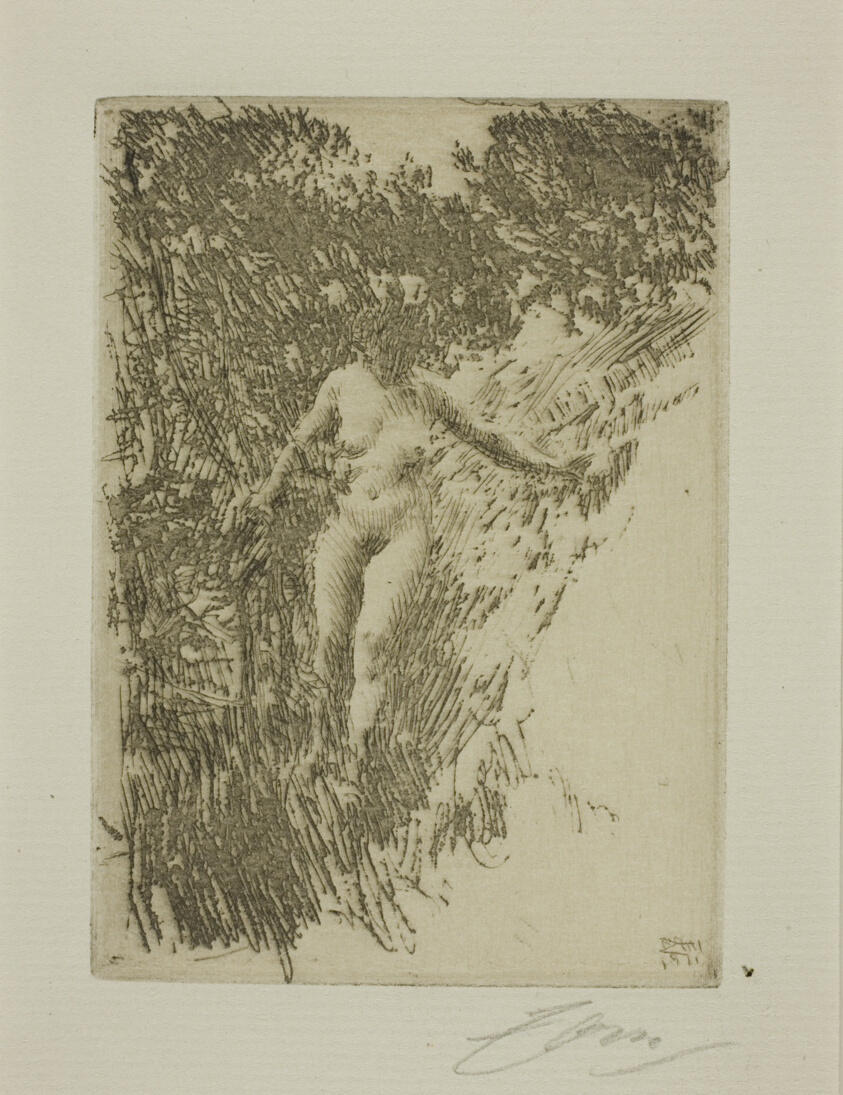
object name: Print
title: Brushwood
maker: Anders Zorn (Swedish, 1860-1920)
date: 1911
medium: Etching on ivory laid paper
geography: Sweden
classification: etching; print; prints and drawing